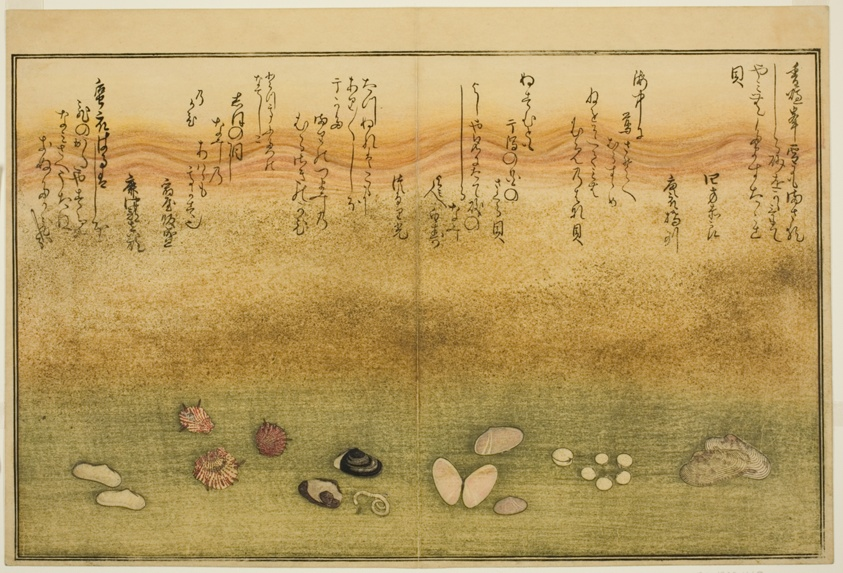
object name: Print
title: Sudare-gai, hana-gai, sakura-gai, mumeno-gai, nadeshiko-gai, and kinuta-gai, from the illustrated book "Gifts from the Ebb Tide (Shiohi no tsuto)"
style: Japanese (culture or style)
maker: Kitagawa Utamaro 喜多川 歌麿; Japanese, 1753 (?)-1806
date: 1789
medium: Color woodblock print; double-page illustration from book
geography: Japan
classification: woodblock print; print; asian art